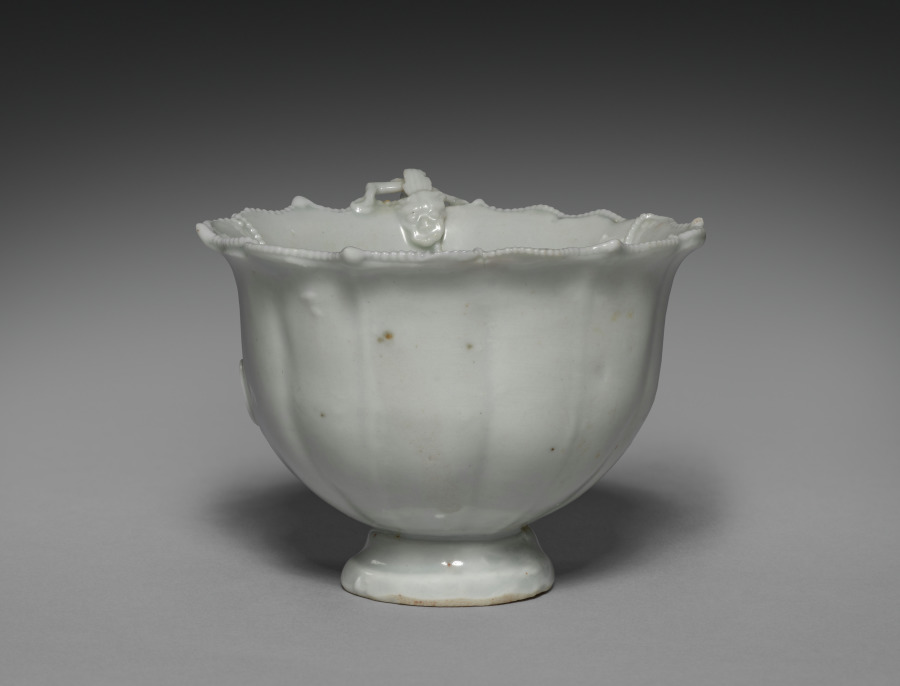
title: Fluted Cup with Dragon Handle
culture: China, Jiangxi Province, Jingdezhen kilns, Yuan dynasty (1271–1368)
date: early 1300s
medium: Glazed porcelain, Qingbai (bluish-white) ware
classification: Ceramic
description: Very thinly potted, the subtly lobed body of this cup is almost translucent. The thin, slightly opaque, light greenish glaze lends a sugary shine. Applied elements, including the handle, beaded borders, and sculptural floret, are constructed and glazed with the same materials as the body, providing a seamless blend of form and decorative embellishment. The result is an evocative reminder of slightly earlier silver cups, also created in the form of flowers. This pristine, natural construction is challenged, however, by the archaic dragon that acts as the handle. Borrowed from the decoration found on much earlier bronzes, this added form illustrates the eclecticism of the Yuan, the attempt to blend present vision with interest in the past.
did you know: Clay beading divides the cup's interior into six foliate panels with a six-petaled flower at the junction of the beaded lines.